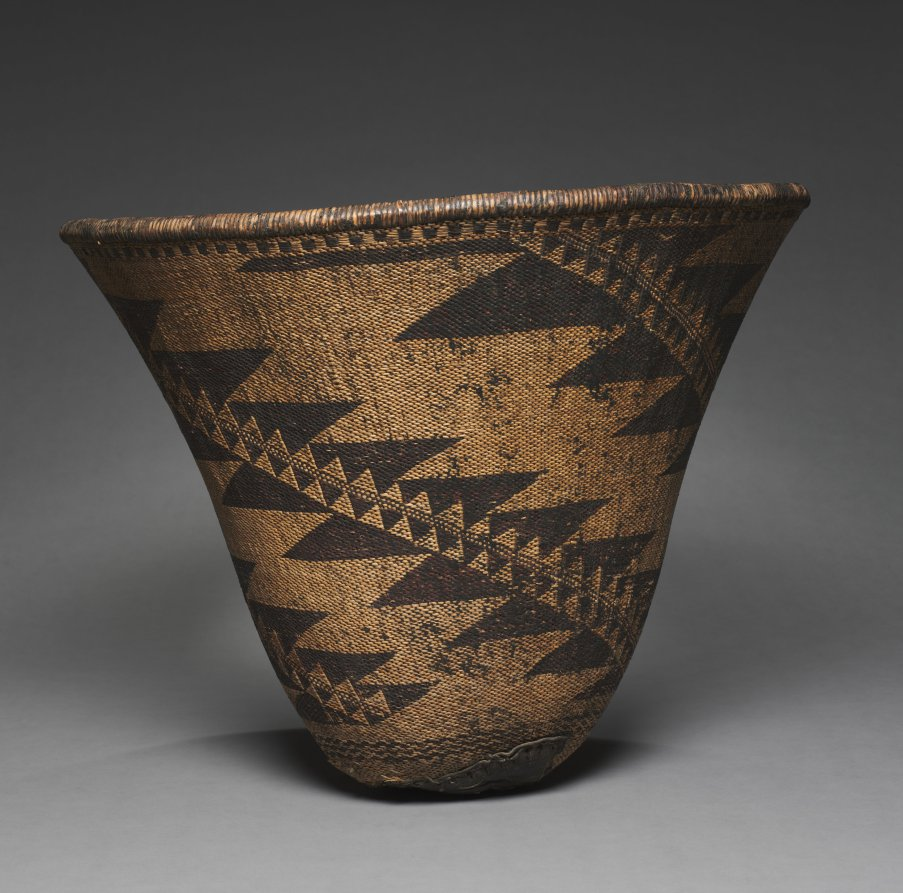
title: Burden Basket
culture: California, Pomo, central, late 19th century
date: 1880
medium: redbud, sedge; diagonal twine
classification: Basketry